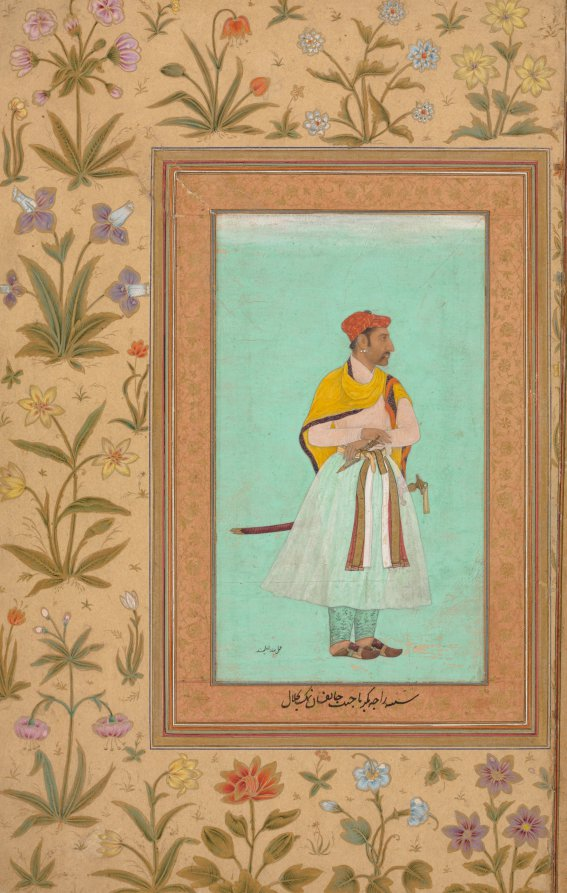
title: Portrait of Raja Bikramajit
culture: Mughal India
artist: Lal Chand (Indian)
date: c. 1620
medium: Gum tempera, ink, and gold on paper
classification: Painting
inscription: lower center: jan-fishan namak ba-halal (life-shedding [or heedless of life] and faithful)